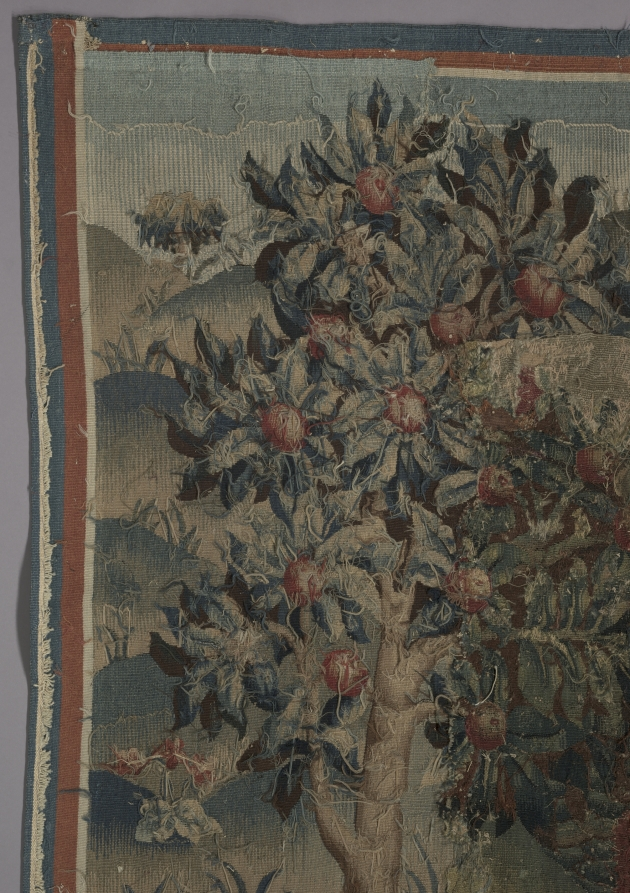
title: Shepherds in a Round Dance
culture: Netherlands, early 16th century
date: around 1500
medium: Wool and silk: tapestry weave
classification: Tapestry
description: Late medieval tapestries often use a limited yet contrasting color palette to portray stylized images. The expressions of these figures, for example, are conveyed more by their postures than by their faces. Four shepherds and shepherdesses join hands and dance to the music of a bagpiper at the far right, while a lord and two ladies on the left look on. A dog and sheep amid blossoming plants and trees contribute to the festive pastoral scene in front of a castle.